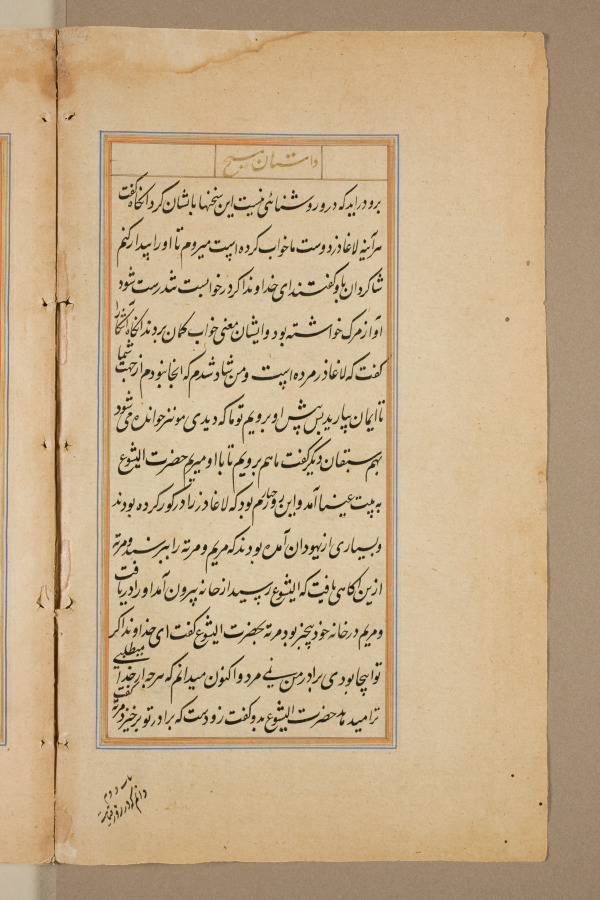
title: Text page from a Mirror of Holiness (Mir’at al-quds) of Father Jerome Xavier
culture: Mughal India, Allahabad, made for Prince Salim (1569–1627)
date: 1602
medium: Ink and gold on paper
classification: Manuscript